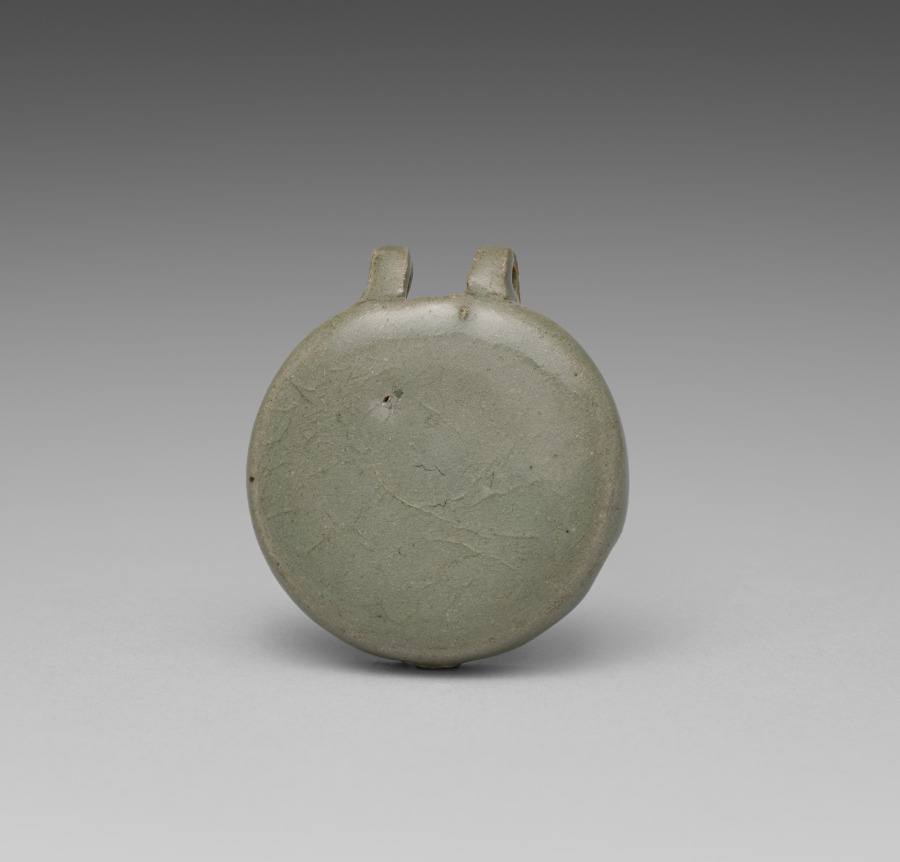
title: Water Ewer for Rituals with Incised Parrot Design (lid)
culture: Korea, Goryeo dynasty (918–1392)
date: 1100s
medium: stoneware with celadon glaze, incised and carved decoration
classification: Ceramic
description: This distinctively shaped celadon vessel is a kundika. With a spout on one side, this type of vessel is often used in Buddhist purification rituals. Unlike most existing examples that have an image of a willow tree, this work has a rare flying phoenix design incised on its surface.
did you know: This distinctively shaped vessel is called a kundika in Sanskrit, simply referring to a water bottle.